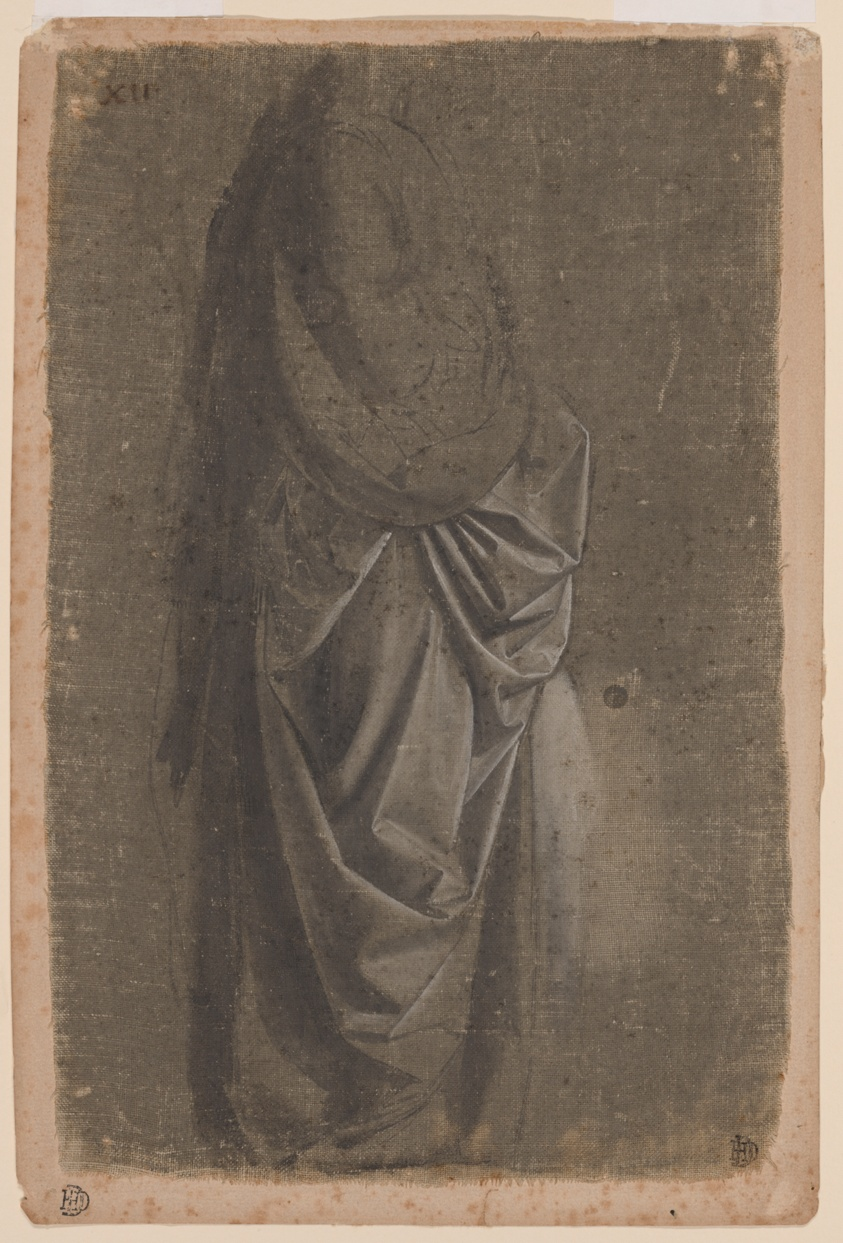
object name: Drawing and Watercolor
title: Drapery Study of a Standing Figure Facing Right, in Profile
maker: Andrea del Verrocchio (Italian, c. 1435–1488)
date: late 1460s–early 1470s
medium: Brush and opaque watercolor, on linen prepared with a gray ground, mounted to cream laid paper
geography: Italy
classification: prints and drawing; watercolor; linen; drawings (visual works)